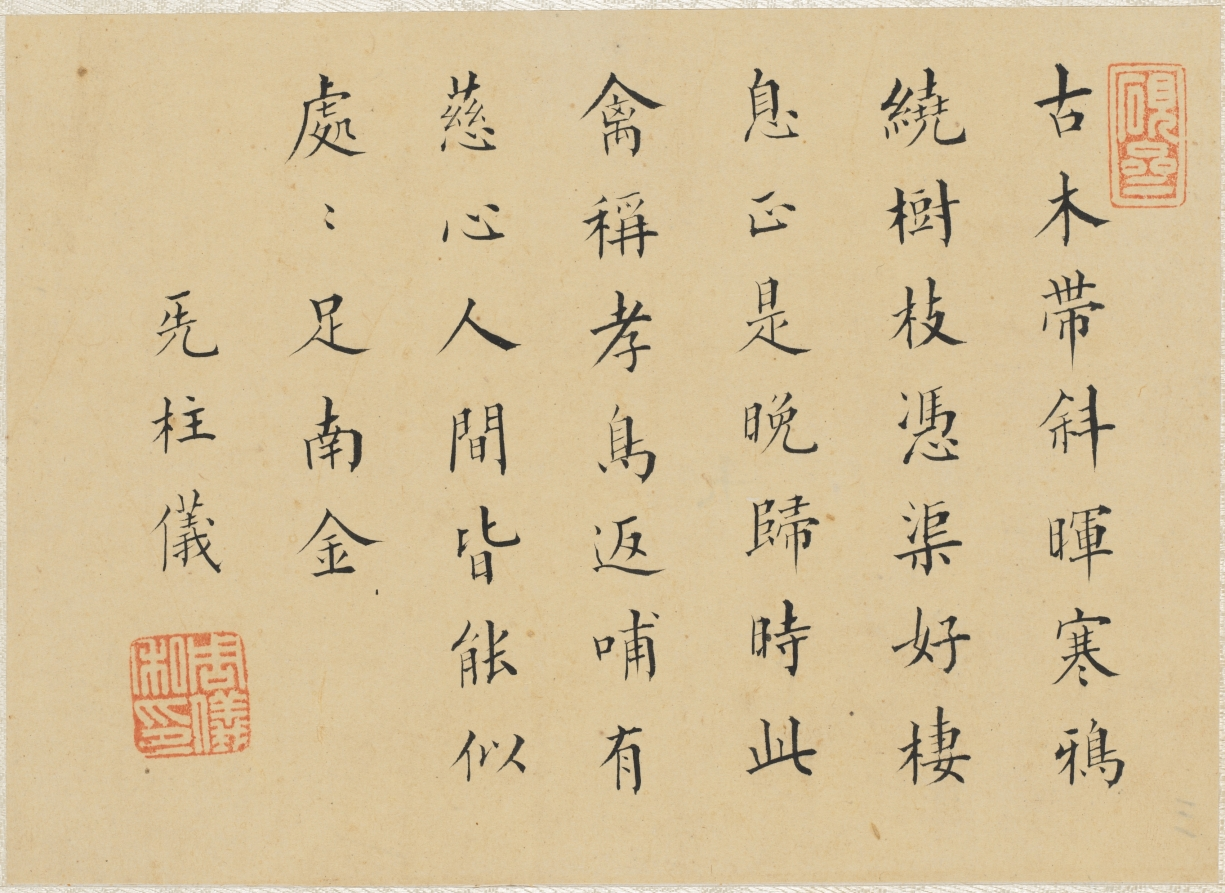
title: Album of Miscellaneous Subjects, Leaf 9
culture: China, Qing dynasty (1644-1911)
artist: Fan Qi (Chinese, 1616–after 1694)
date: early 1650s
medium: album leaf, ink and color on silk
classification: Painting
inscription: Artist seal: Fan Qi 樊圻. Poem by Zhou Yi 周儀 (mid 17th century–about 1705): Ancient trees share the slanting rays of the setting sun/ Chilly ravens hover round their branches/ The leader of the flock thinks this is a good place to rest,/ Evening being the time for returning./ This flock is the so-called a filial crow,/ Who, in disgorging their food [to feed their young], have compassionate hearts,/ Were the people in the world all like this,/ Fine talent would be everywhere.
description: Leaf 9 Zhou Yi's colophon reads: Ancient trees share the slanting rays of the setting sun. Chilly ravens hover round their branches. The leader of the flock thinks this a good place to rest, Evening being the time for returning. This flock is the so-called filial crow, Who, in disgorging their own food [to feed the young], have compassionate hearts. Were the people in the world all like this, Fine talent would be everywhere.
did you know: The winter landscape turns ocher at dusk, and the birds roost for the night.